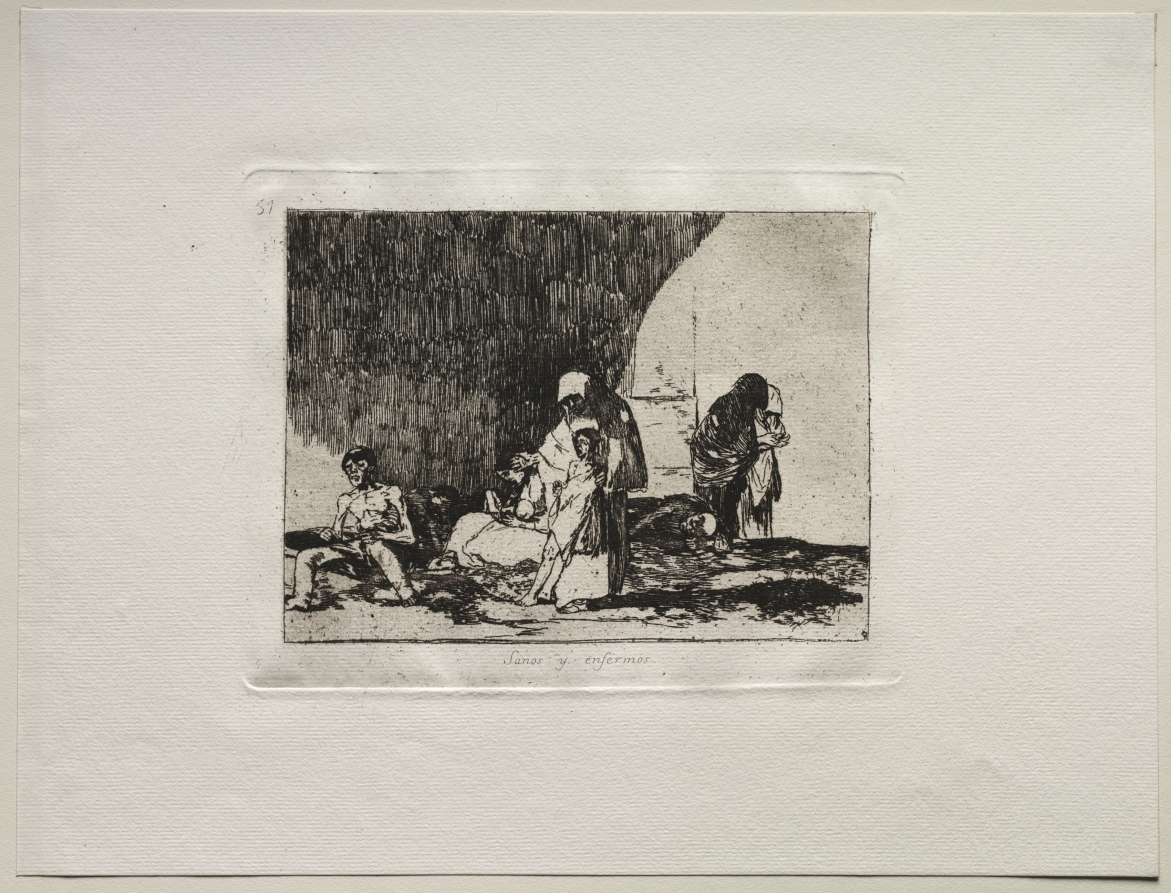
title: The Horrors of War: The Healthy and the Sick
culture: Spain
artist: Francisco de Goya (Spanish, 1746–1828)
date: c. 1810–20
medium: etching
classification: Print